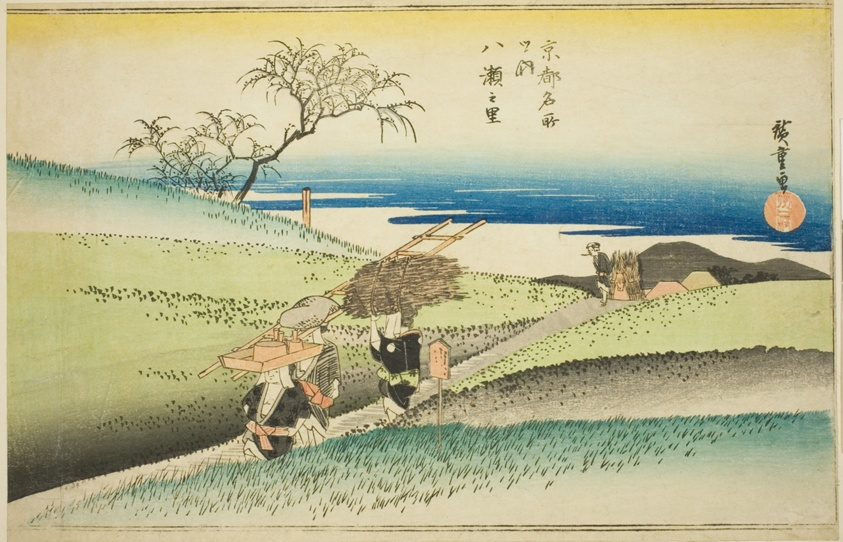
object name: Print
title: The Village of Yase (Yase no sato), from the series "Famous Places in Kyoto (Kyoto meisho no uchi)"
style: Japanese (culture or style)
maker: Utagawa Hiroshige 歌川 広重; Japanese, 1797-1858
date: c. 1834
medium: Color woodblock print; oban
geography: Japan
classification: woodblock print; print; asian art